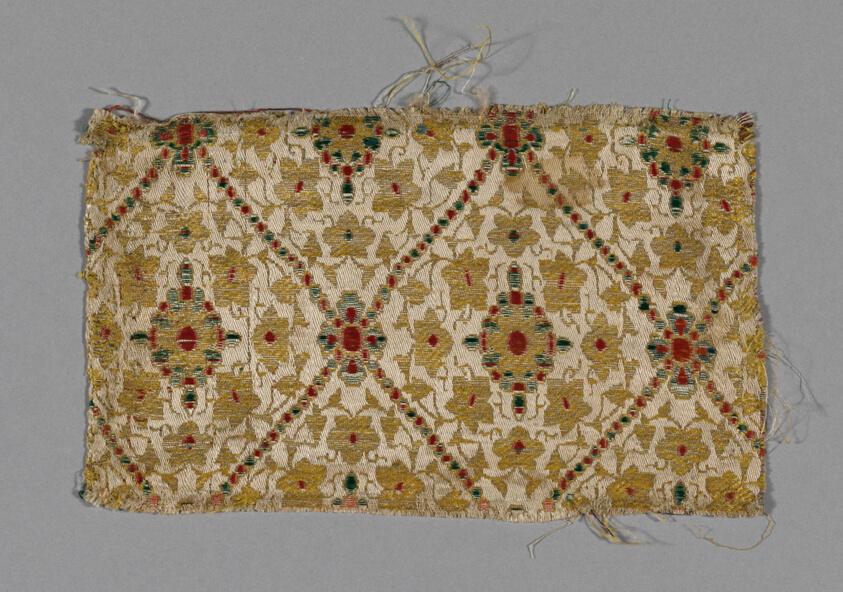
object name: Textile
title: Fragment (Dress Fabric)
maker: Near East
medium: Silk and gilt strip wound around a silk fiber core, warp-float faced twill weave, with supplementary patterning wefts and supplementary binding warps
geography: Middle East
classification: textile; weaving